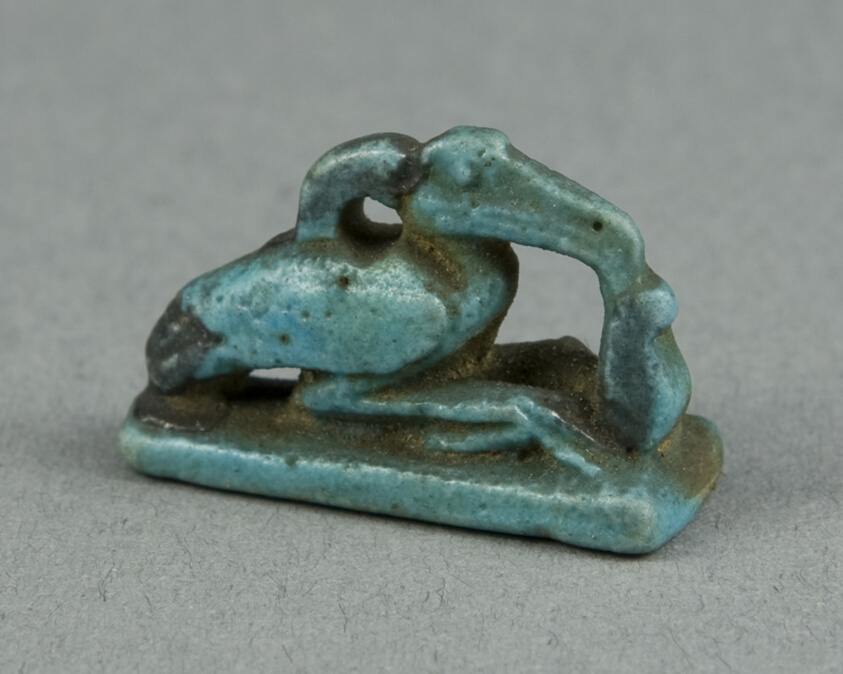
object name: Costume and Accessories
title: Amulet of the God Thoth as a Crouched Ibis with Feather of Maat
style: egyptian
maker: Egyptian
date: Late Period–Ptolemaic Period (7th–1st century BCE)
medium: Faience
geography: Egypt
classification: amulet; jewelry; ceramics; ancient art; costume; faïence (composite material)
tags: gods (deities)